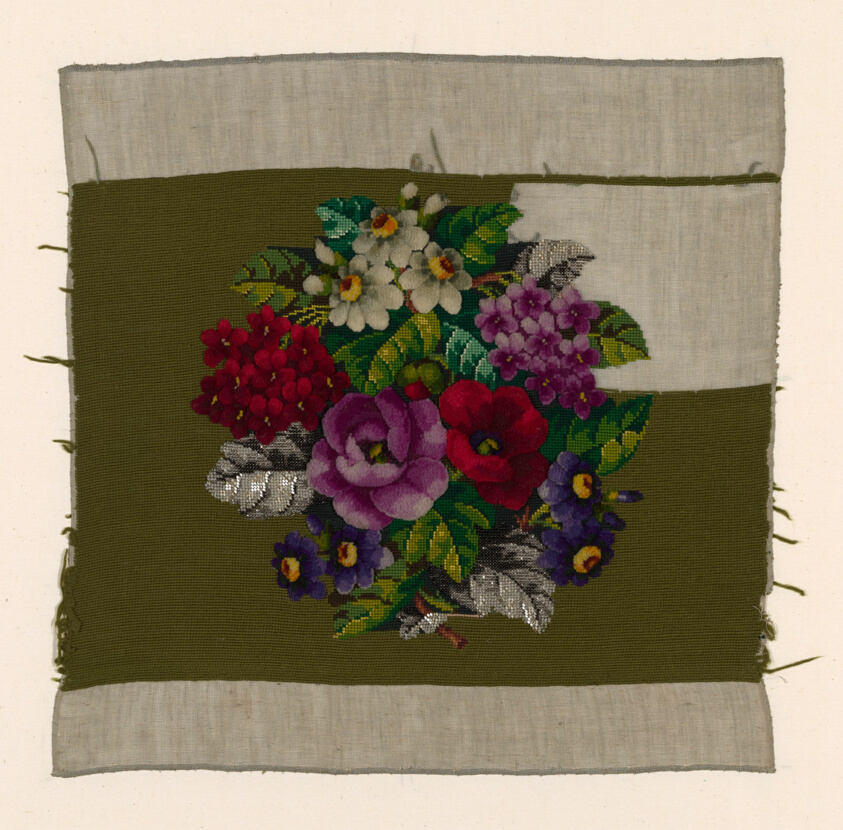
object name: Textile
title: Chair Seat (Unfinished)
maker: United States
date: 19th century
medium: Cotton, plain weave; embroidered with wool and silk in cross, trammed tent and single knotted stitches; beaded with glass and metallic beads in linen yards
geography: United States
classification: textile; needlework (visual works)